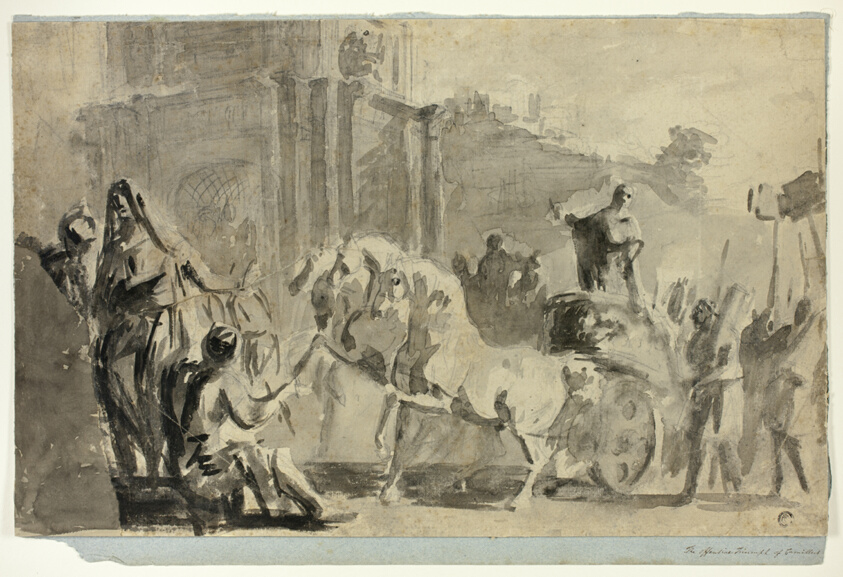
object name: Drawing and Watercolor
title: The Offensive Triumph of Camillus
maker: Attributed to Sawrey Gilpin (English, 1733-1807); or a follower of George Romney (English, 1734-1802)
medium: Brush and gray wash, over graphite, on buff laid paper, laid down on card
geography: England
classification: ink or chalk wash; paper; drawings (visual works); prints and drawing; brush and wash